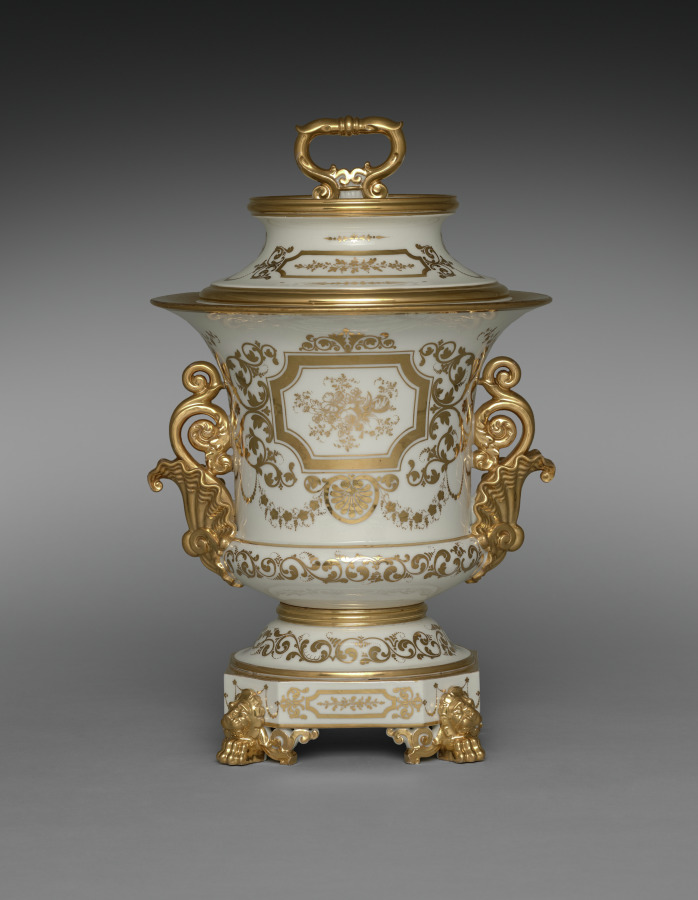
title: Covered Ice Cream Pail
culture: France, Paris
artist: Factory of Jacob-Petit (French, 1830–1865)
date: c. 1840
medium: gilt porcelain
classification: Ceramic